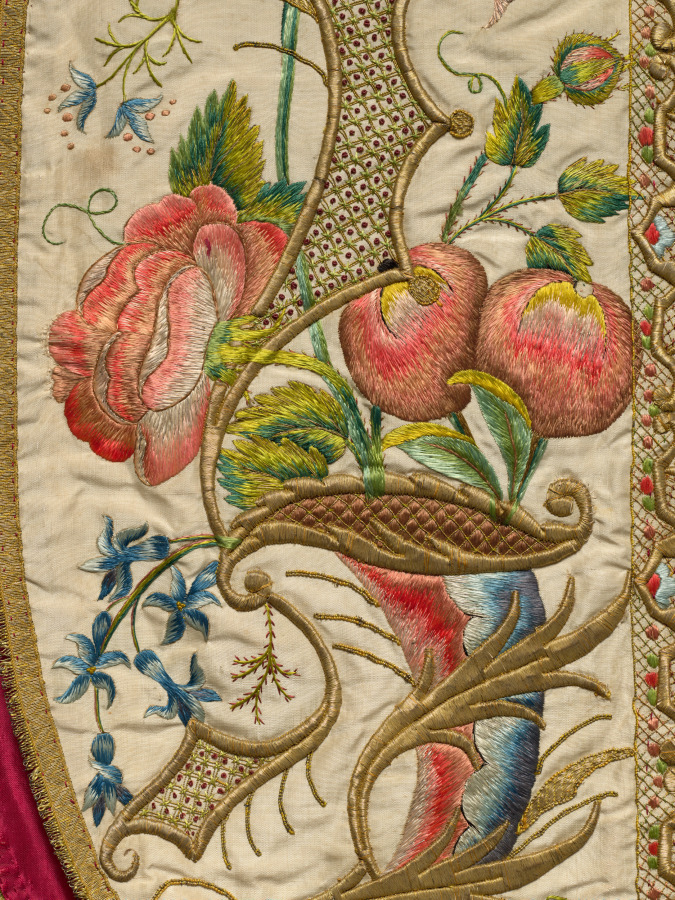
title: Chasuble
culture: Italy or Spain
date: 1700s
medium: Silk and metallic threads: embroidery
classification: Embroidery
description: The chasuble’s exquisite symmetrical decoration highlights its central panel where three illusionary gold containers hold skillfully shaded fruit in pastel silk tones. Delicately curving motifs enhance the side panels along with finely stitched strawberries in so-called French knots. This liturgical chasuble and other vestments, worn over a white alb with lace, were embroidered by professional specialists, such as experts who shaded colored silks or secured gold thread, in early versions of assembly lines that were usually in secular workrooms or in convents. The church or commissioner supplied the raw materials and paid a fee for the work.